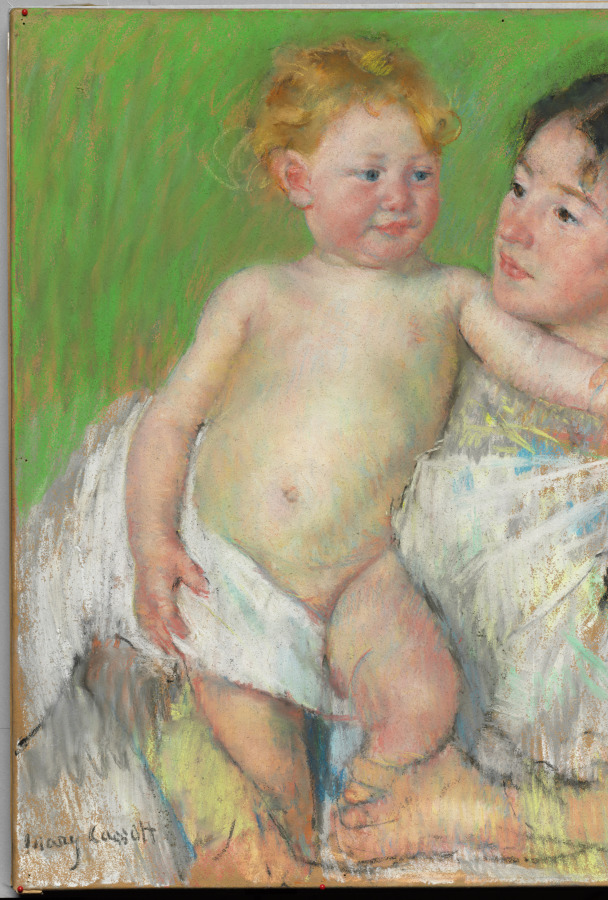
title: After the Bath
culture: America, late 18th-19th Century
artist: Mary Cassatt (American, 1844–1926)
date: 1901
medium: pastel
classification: Drawing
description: Mary Cassatt began using pastel in the 1870s and continued to experiment with the medium throughout her career. This drawing depicts a mother and child, one of the artist's preferred subjects. Cassatt typically used the technique seen here, in which she finished her sitters' faces with a high degree of detail but rendered the rest of the composition in a much looser and sketchier style.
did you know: Mary Cassatt once commented that pastel was "the most satisfactory medium for [portraying] children," since they could not sit still for long and the medium allowed for rapid sketching.